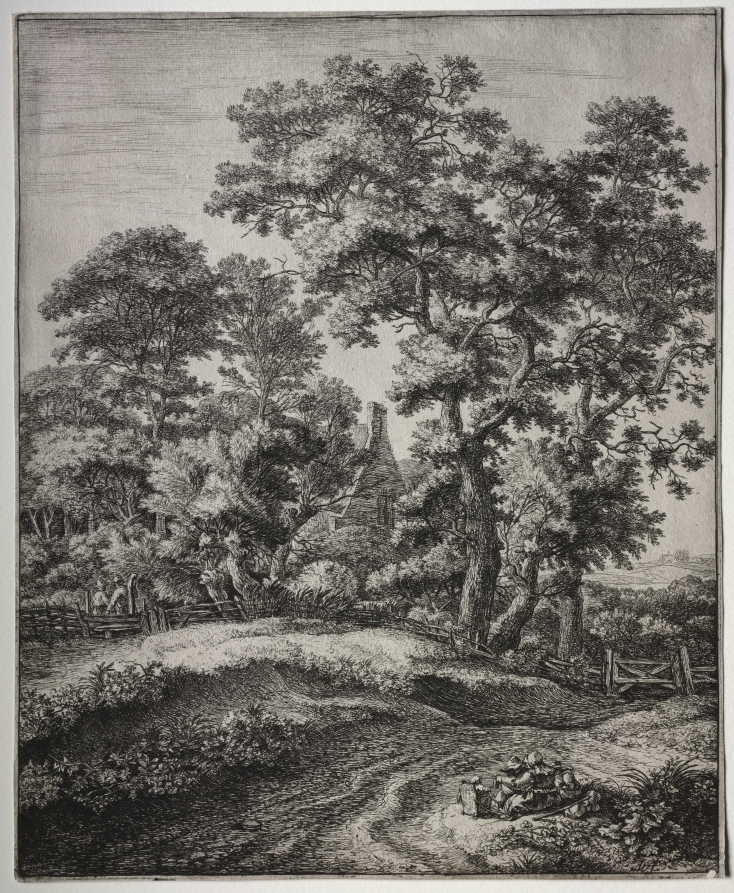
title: Six Large Upright Landscapes: A Mother and Three Children at Rest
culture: Netherlands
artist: Anthonie Waterloo (Dutch, 1609/10–1690)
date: 1640–90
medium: etching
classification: Print